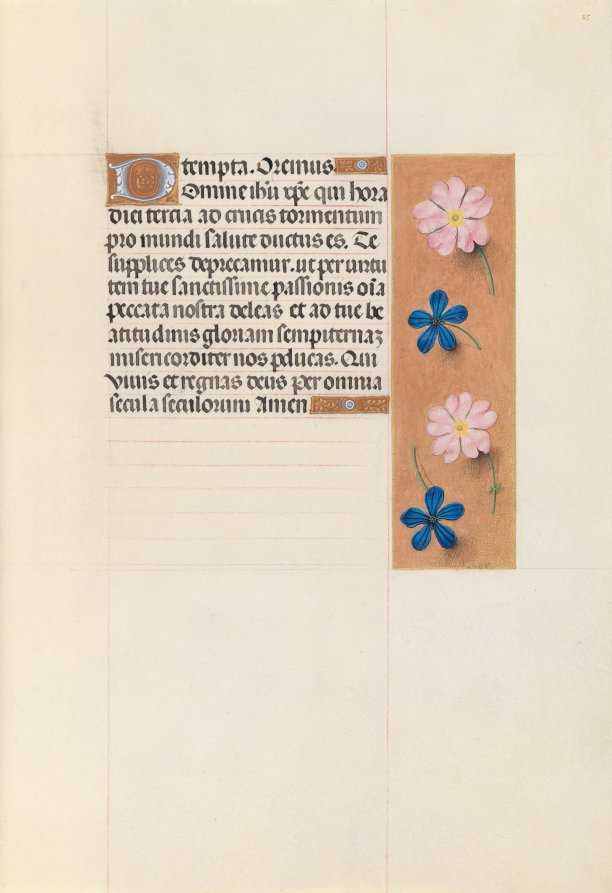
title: Hours of Queen Isabella the Catholic, Queen of Spain: Fol. 65r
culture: Flanders, Ghent and Bruges, late 15th century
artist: Master of the First Prayerbook of Maximillian (Flemish, c. 1444–1519)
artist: and Associates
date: c. 1500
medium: ink, tempera, and gold on vellum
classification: Bound Volume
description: This manuscript was illuminated by a circle of at least five highly organized manuscript painters active in the Flemish cities of Ghent and Bruges. The principal illuminator was Alexander Bening, who painted the majority of the book's miniatures. Manuscripts produced by this circle of artists are renowned for the decoration of their borders, which typically feature a rich variety of realistically-painted flowers, birds, and butterflies. This prayer book, called a book of hours, was intended not for a cleric, but for the private devotions of a lay person-in this case, Isabella the Catholic, Queen of Spain (1451-1504). Isabella's coat of arms embellishes the book's frontispiece. It is unlikely that the book was commissioned by the Queen herself; rather, she probably received it as a diplomatic gift from someone courting her patronage, perhaps Cardinal Francisco Jimenez de Cisneros. A Franciscan friar, Jimenez was dependent upon Isabella for his advancement, first to the post of Queen's confessor in 1492, and then to Archbishop of Toledo in 1495.